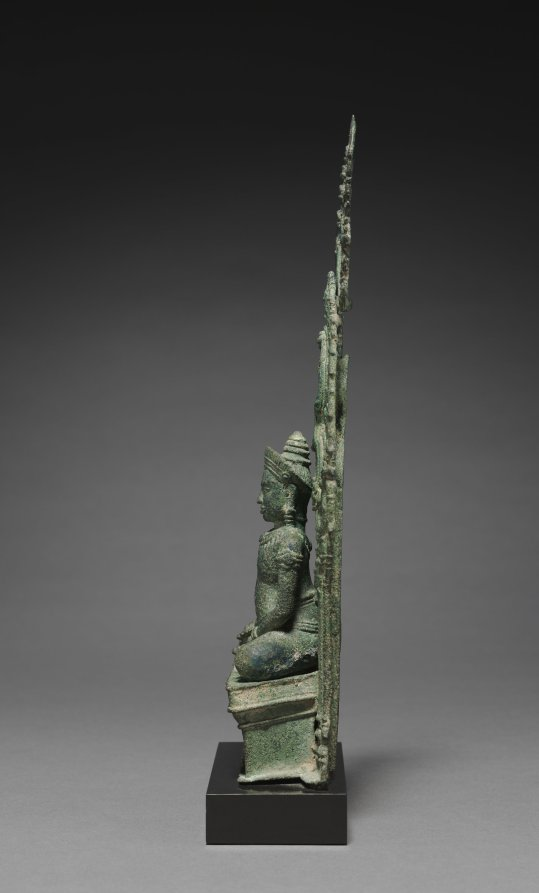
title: Altarpiece with Buddha Enthroned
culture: Cambodia, found in Vietnam, near Ho Chi Minh City, Reign of Suryavarman II, Angkor Wat Period, 1st half 12th Century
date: mid-1100s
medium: bronze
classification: Sculpture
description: The crown and jewels of this Buddha indicate that he is a transcendent Buddha, not the historical Buddha who lived in the 5th century BCE. Small-scale bronze images of transcendent Buddhas were used in tantric practices as personal meditation images or in ritual settings. Tantric Buddhism was adopted as the state religion during the 12th century in the region of Angkor. A depiction of the tree that references the moment of the Buddha’s enlightenment is above the scalloped serpentine form of the niche under which he sits enthroned on an altar. An object interpreted as a lotus bud rests on the hands in his lap as he sits in a posture of meditation.